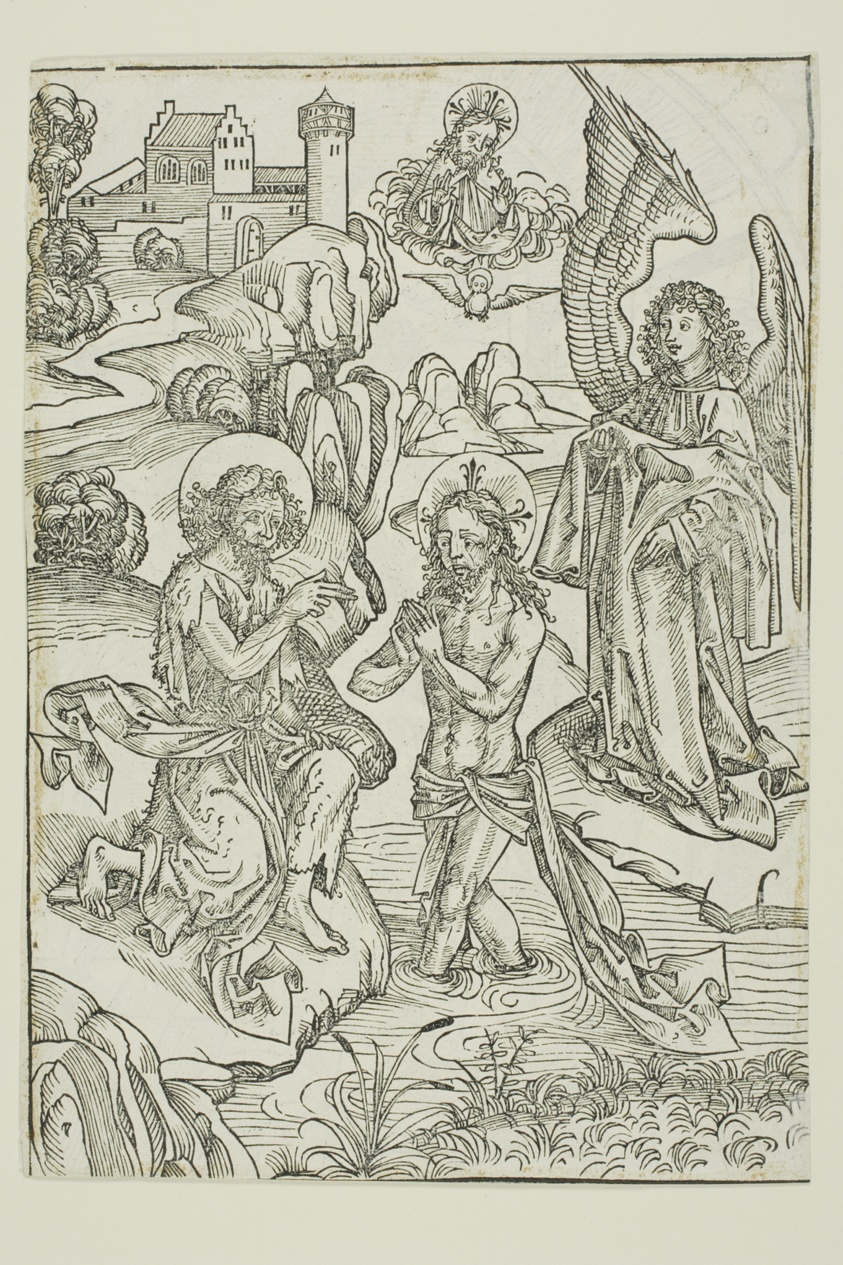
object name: Print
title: The Baptism of Christ (verso); The Circumcision of Christ (recto), pages 34 and 33, from the Treasury (Schatzbehalter)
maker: Michael Wolgemut and Workshop (German, 1434/37–1519); published by Anton Koberger (German, 1440–1513)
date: 1491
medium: Woodcut in black on ivory laid paper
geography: Germany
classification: woodcut; print; prints and drawing